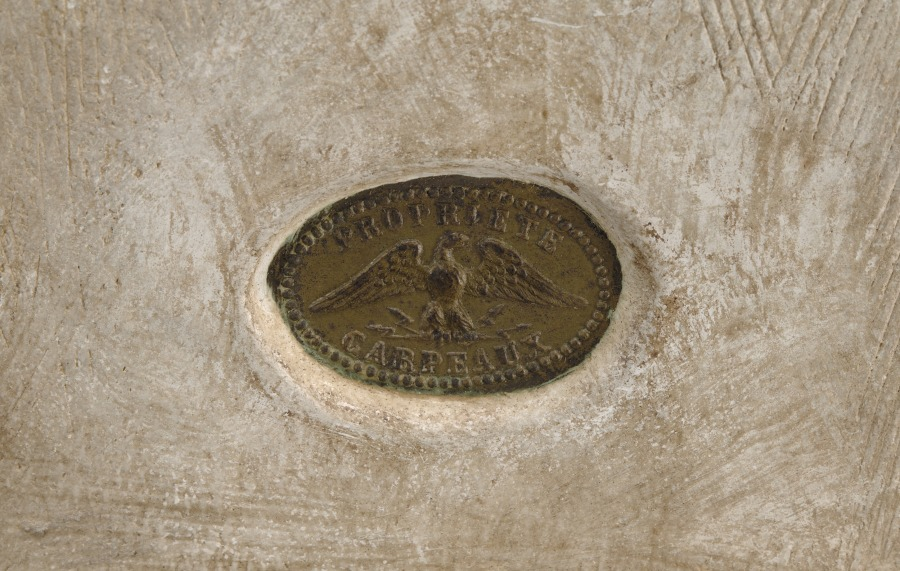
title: Bust of a Chinese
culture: France, 19th century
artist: Jean-Baptiste Carpeaux (French, 1827–1875)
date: 1867–68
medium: plaster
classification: Sculpture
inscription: inset into bust near base at rear is struck copper plate inscribed: "PROPRIETE CARPEAUX" with an eagle in the center.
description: This bust is related to the allegorical figure of Asia in Carpeaux's monumental bronze fountain, The Four Parts of the World Upholding the Celestial Sphere, commissioned by Baron Haussmann in 1867 for the Luxembourg Gardens in Paris. The figure was changed into a woman in the fountain and reflects the artist's interest in accurately portraying different ethnic groups. This bust exists in various sizes and media.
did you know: Greatly admired during his time, Jean-Baptiste Carpeaux received important commissions from French Emperor Napoleon III and Baron Georges-Eugène Haussmann.